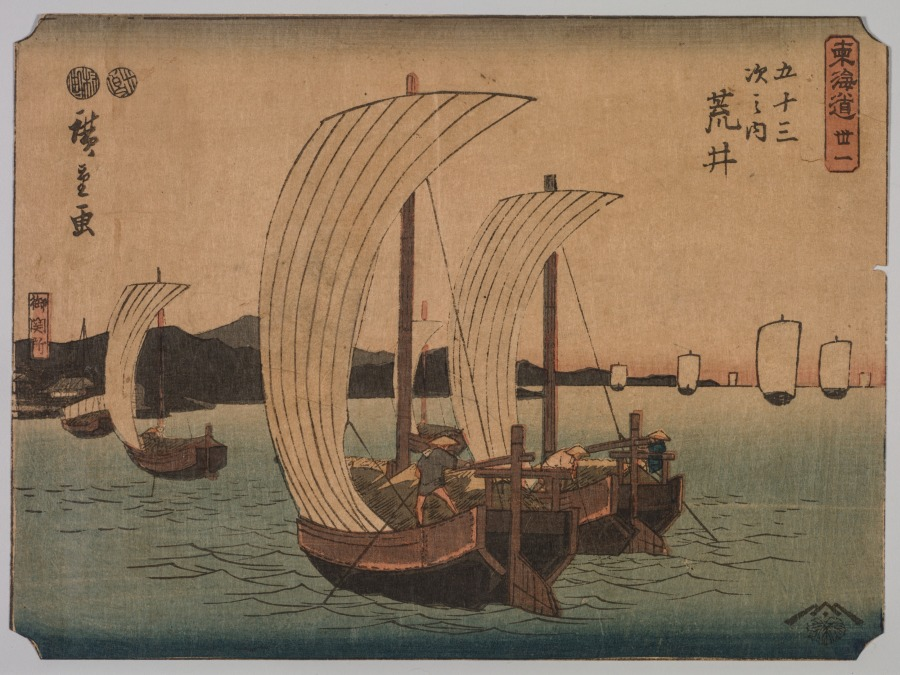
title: Sail Boats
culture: Japan, Edo period (1615–1868)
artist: Utagawa Hiroshige II (Japanese, 1826–1869)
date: 1839–1864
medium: color woodblock print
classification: Print